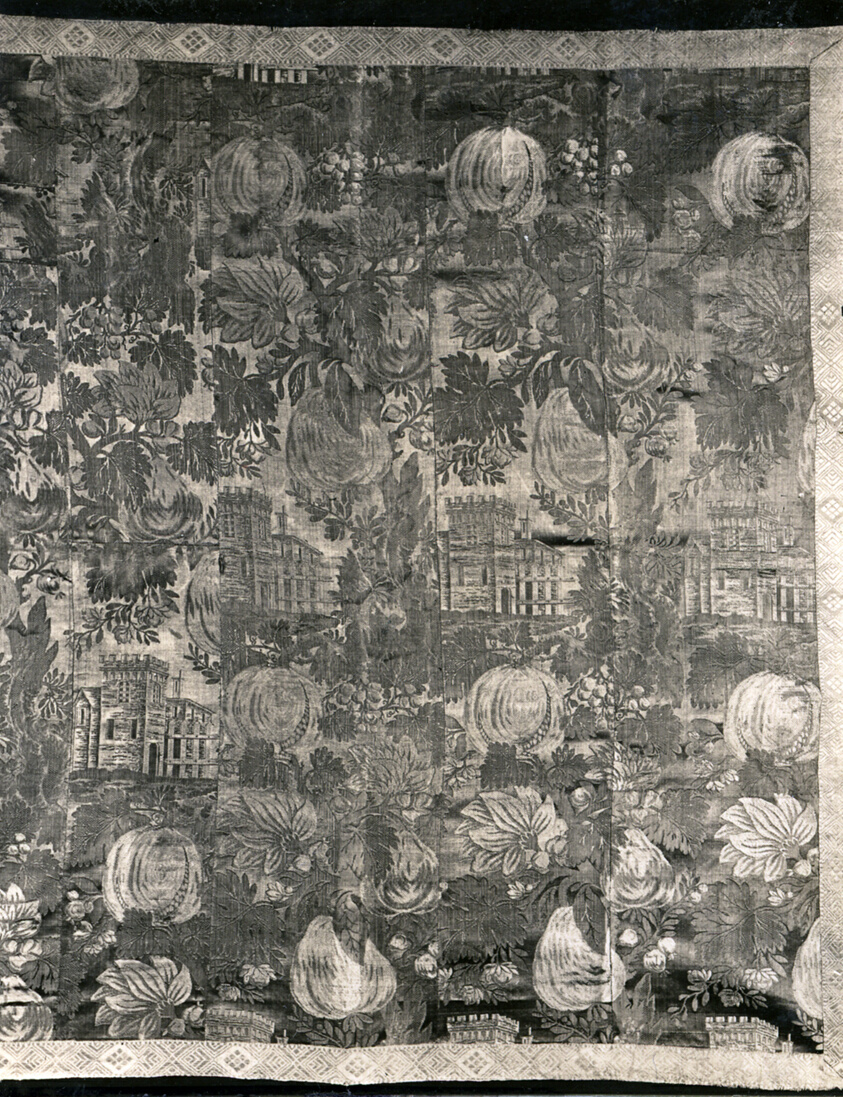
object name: Textile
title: Panel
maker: France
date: 1735/36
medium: Silk, warp-float faced 7:1 satin weave of two-color complementary ground wefts with supplementary patterning and brocading wefts bound in twill interlacings and supplementary binding warps tying some self-patterning ground wefts in plain interlacing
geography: France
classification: textile; weaving